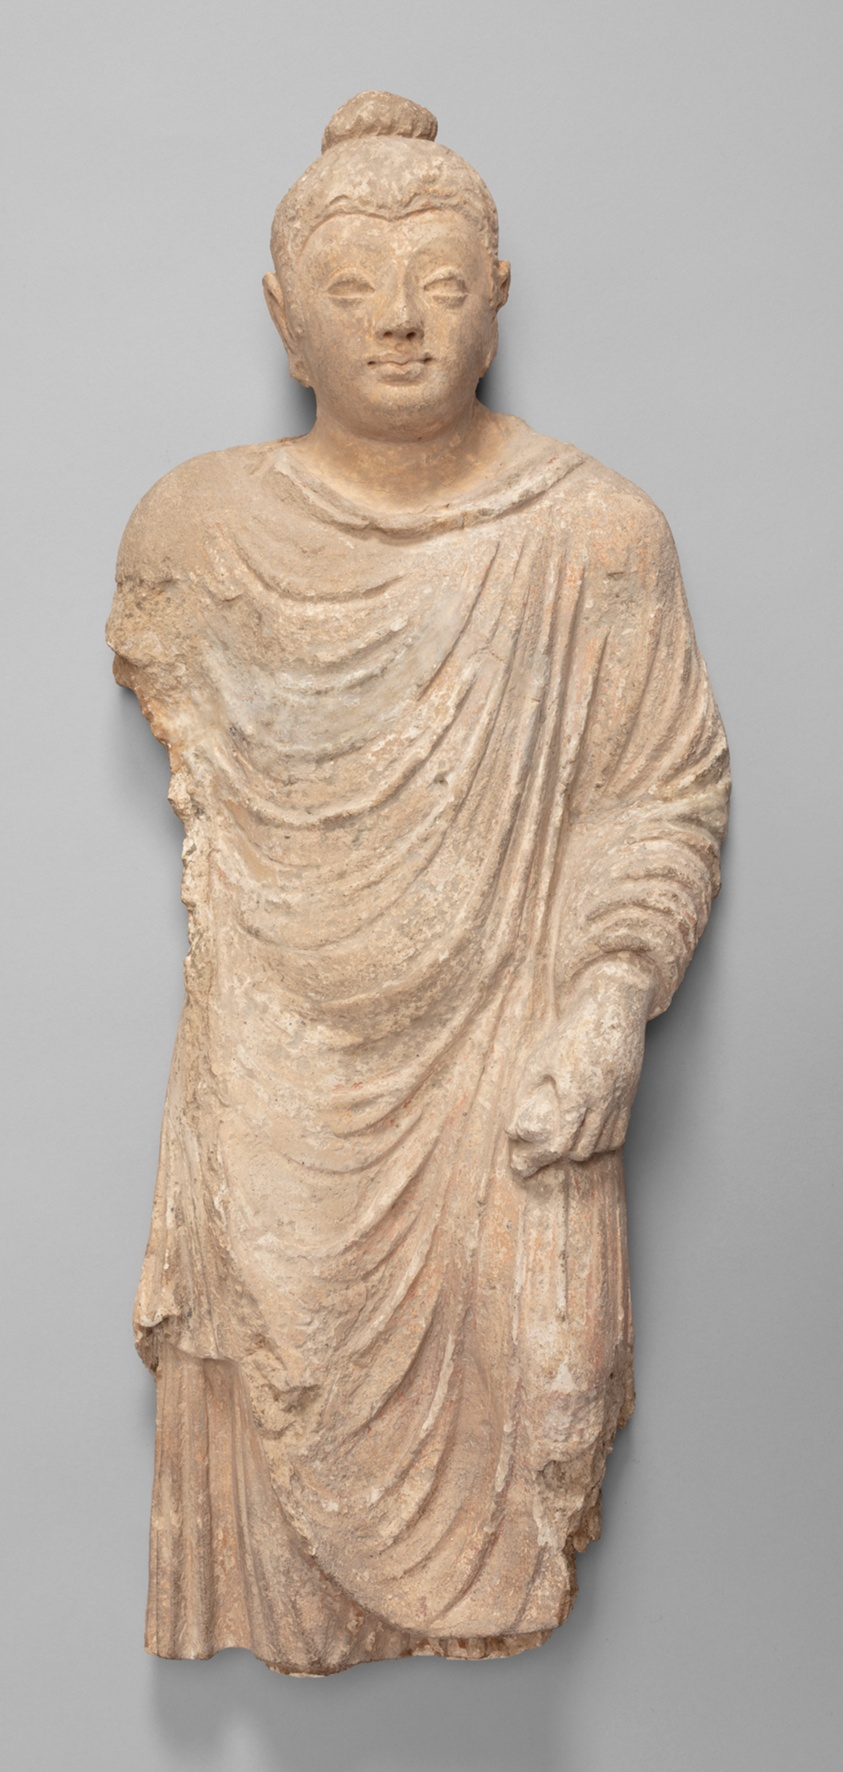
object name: Sculpture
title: Walking Buddha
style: South Asian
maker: Afghanistan or Pakistan; Ancient region of Gandhara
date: Kushan period, 3rd/4th century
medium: Stucco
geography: Gandhara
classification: stuccowork; sculpture; asian art